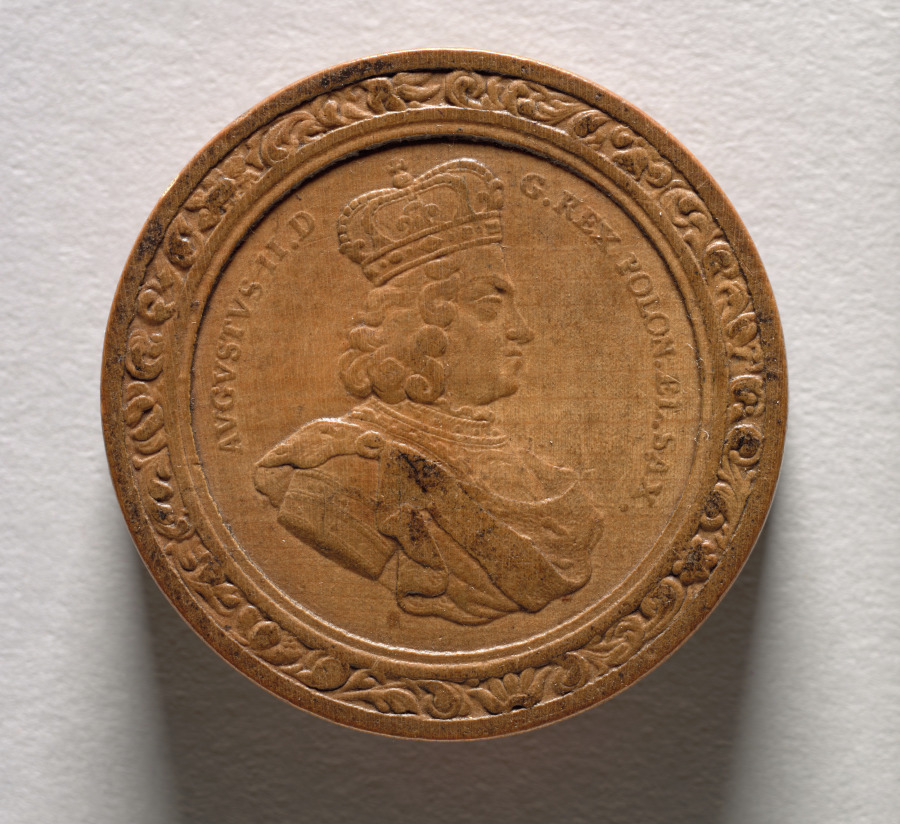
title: Gaming Piece (obverse)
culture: Germany, late 17th-early 18th Century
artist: Martin Brunner (German, 1659–1725)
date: c.1700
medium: wood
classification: Furniture and woodwork